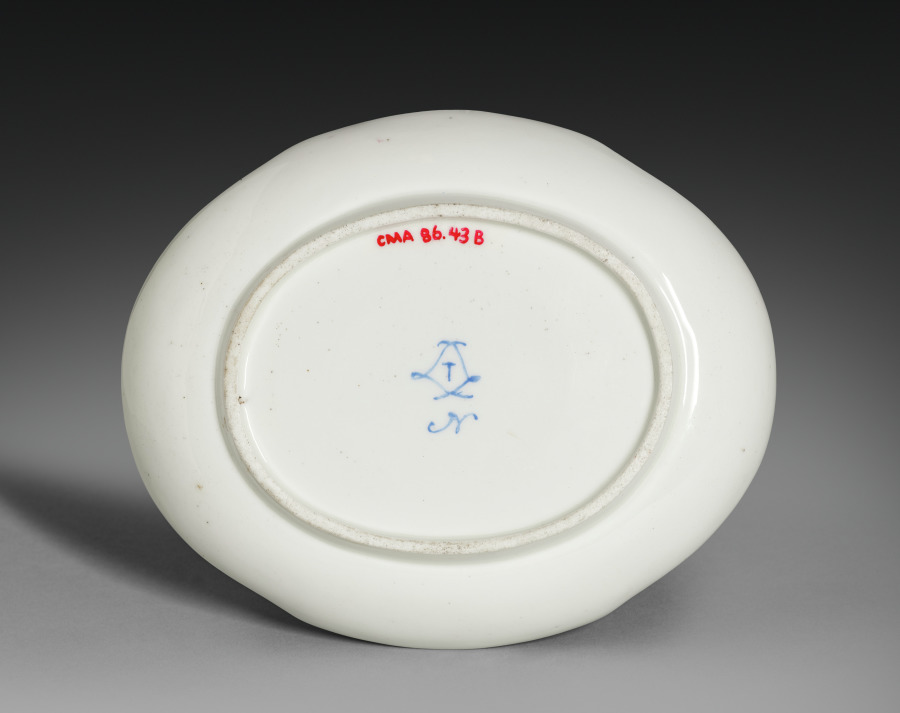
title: Stand for a Broth Bowl (Plateau Ovale)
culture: France, Sèvres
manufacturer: Sèvres Porcelain Factory (French, est. 1756)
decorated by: François-Joseph Aloncle (French)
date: 1772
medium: soft-paste porcelain with enamel an gilt decoration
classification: Ceramic